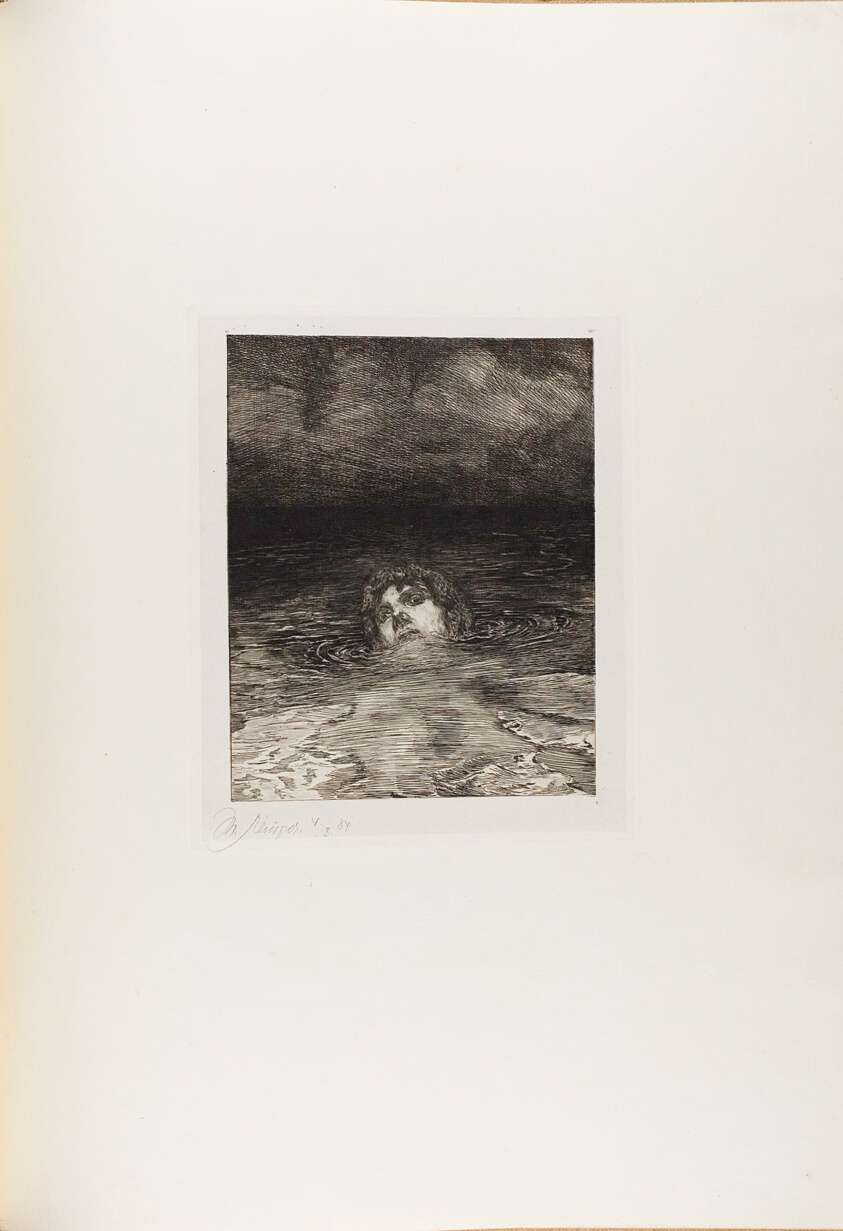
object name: Print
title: Downfall, from A Life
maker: Max Klinger (German, 1857-1920); printed by Otto Felsing (German, 19th century)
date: 1884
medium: Etching, with aquatint and drypoint on ivory China paper, laid down on cream laid paper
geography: Germany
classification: etching; print; prints and drawing